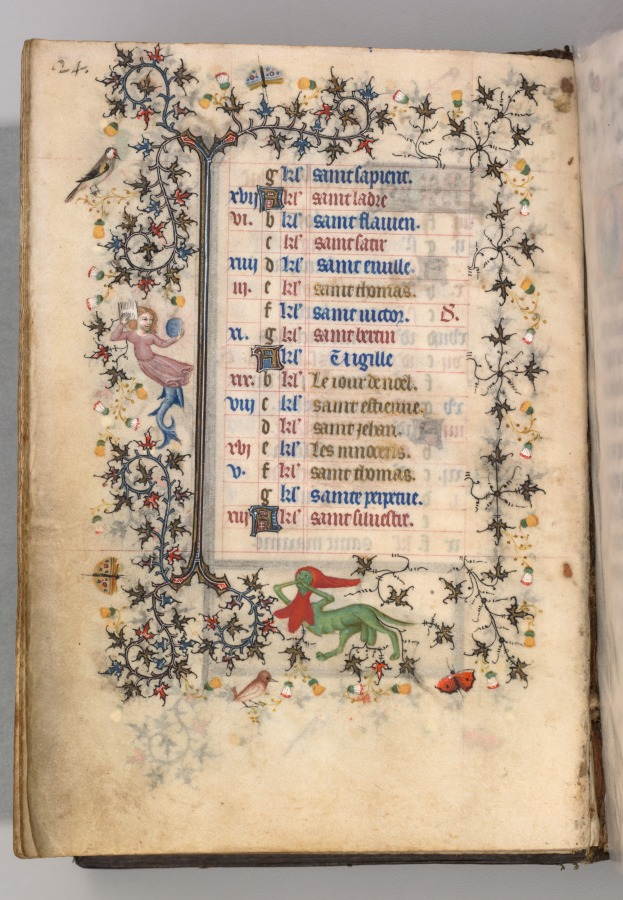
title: Hours of Charles the Noble, King of Navarre (1361-1425): fol. 12v, December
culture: France, Paris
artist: Master of the Brussels Initials and Associates (French)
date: c. 1405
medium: ink, tempera, and gold on vellum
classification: Bound Volume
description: This precious book was highly prized by its owner, Charles III, King of Navarre, a French-born prince whose coat of arms is painted on 20 folios. Charles visited Paris on numerous occasions and likely acquired this volume there in 1404. Paris was the center of the European book trade at the time and attracted illuminators from many parts of Europe. This manuscript represents one of the most remarkable fusions of French and Italian taste in book illumination. Though conforming to Parisian standards, most of the book’s major miniatures are the work of the Brussels Initials Master, an Italian illuminator who previously worked in Bologna and Padua.